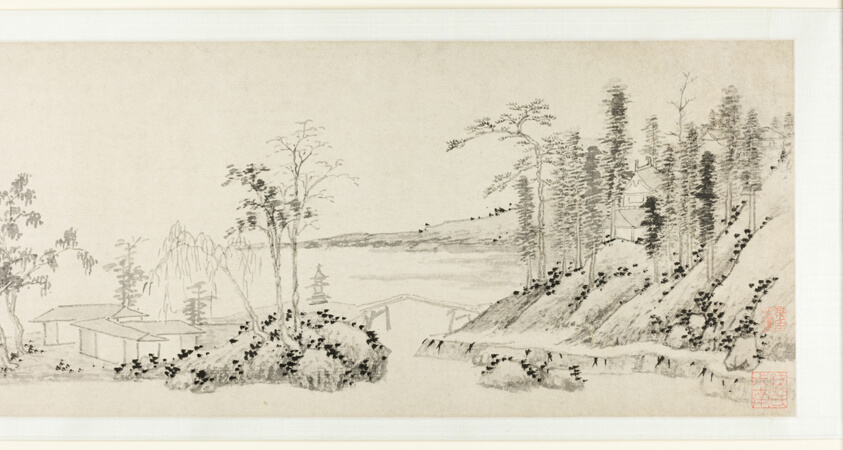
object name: Painting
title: Return to Stone Lake 石湖歸棹圖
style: Chinese (culture or style)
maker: Shen Zhou, 沈周; Chinese, 1427-1509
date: Ming dynasty (1368–1644), dated 1466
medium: Handscroll; ink on paper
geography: China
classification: handscroll; painting; asian art